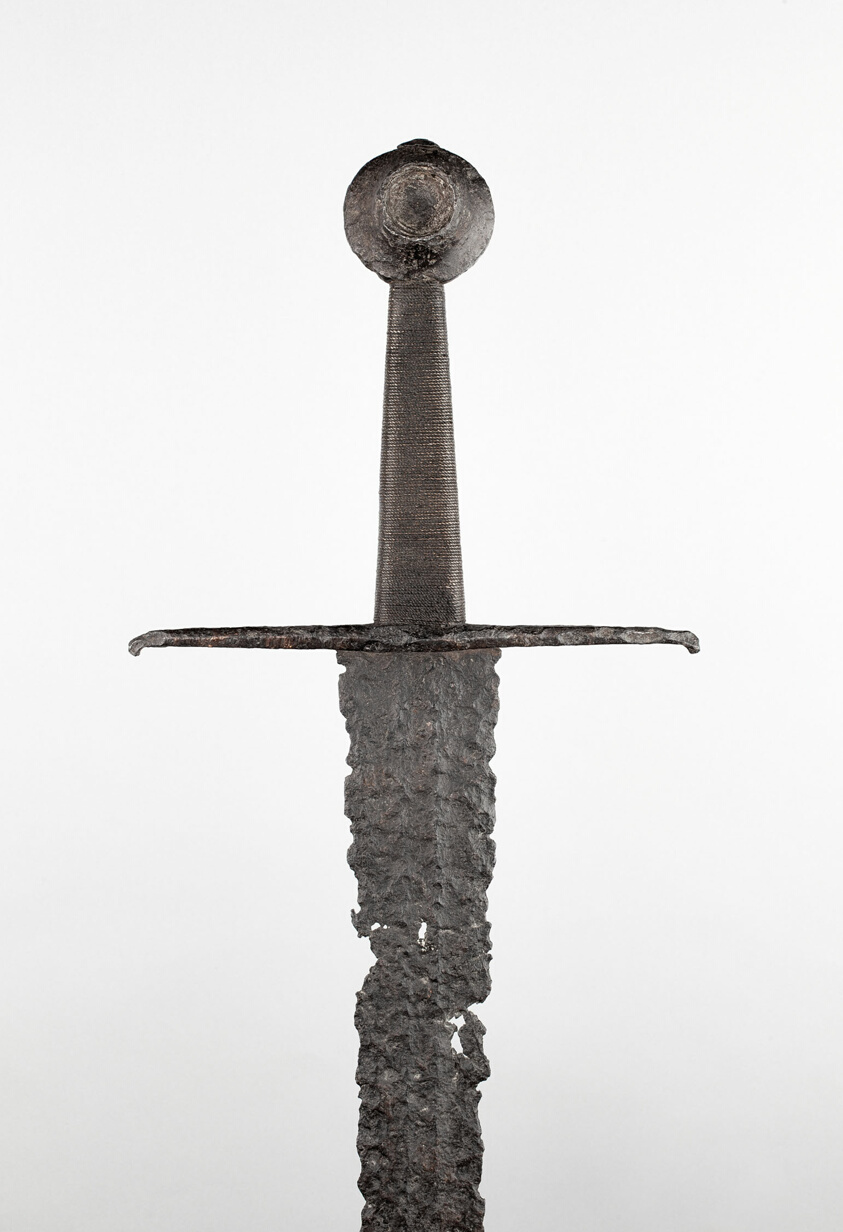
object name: Arms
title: Sword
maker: European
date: early 15th century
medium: Iron, steel, wood, and cord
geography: Europe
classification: edged weapon-sword; arms; arms and armor